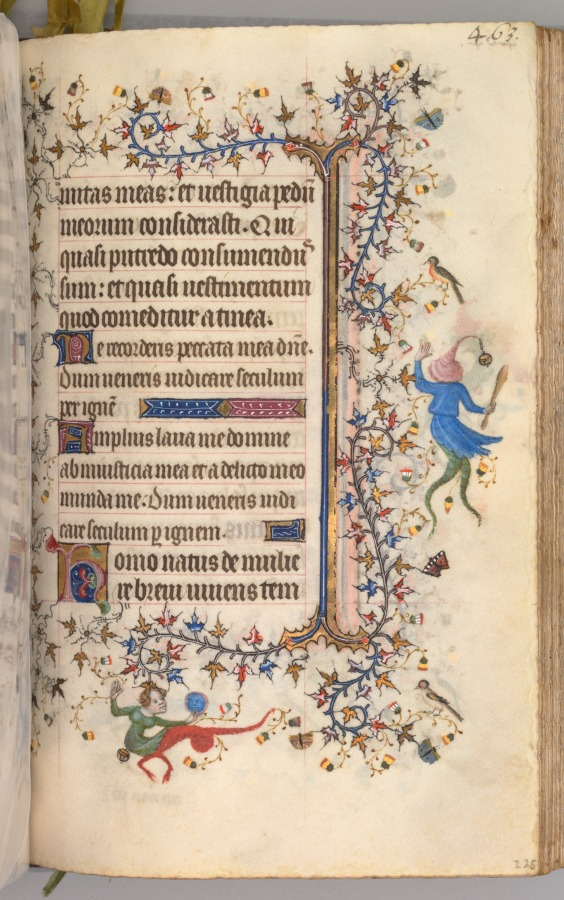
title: Hours of Charles the Noble, King of Navarre (1361-1425): fol. 226r, Text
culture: France, Paris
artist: Master of the Brussels Initials and Associates (French)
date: c. 1405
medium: ink, tempera, and gold on vellum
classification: Bound Volume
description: This precious volume was obviously highly prized by its owner, the French-born King of Navarre, who had his coat of arms painted on no less than twenty folios. Rather than directly commissioning this manuscript from a specific workshop, it seems that Charles the Noble acquired his book of hours -- perhaps ready-made for the luxury market -- while on a trip to Paris in 1404-05. A collaborative effort, six painting styles are evidenced within the pages of this codex, those of two Italians, two Frenchmen, and two Netherlanders. The painter who was responsible for the planning and decoration of the book, and who produced seventeen of the large miniatures, was a Bolognese artist known as the Master of the Brussels Initials. His principal assistant, responsible for most of the borders, was a Florentine who signed his name "Zecho" da Firenze on folio 208 verso.